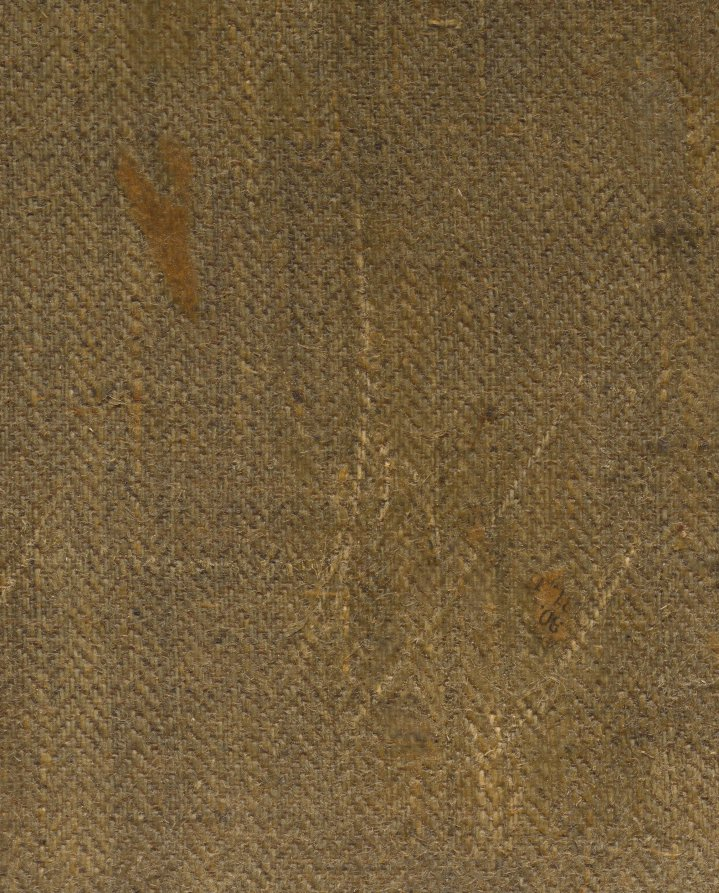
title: Silver Wine Jug, Ham, and Fruit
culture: Netherlands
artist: Abraham van Beyeren (Dutch, 1620/21–1690)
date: c. 1660–66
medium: oil on canvas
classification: Painting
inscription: Signed lower left: "AVB g. [monogram]"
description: With their typically large scale, and loose and energetic brushwork, Abraham van Beyeren’s opulent still life paintings were designed to be seen from a slight distance—perhaps installed over a mantelpiece. Here, for example, the silver wine jug is painted with rough strokes that seem almost abstract when viewed up close, but from a distance it becomes a fully realized object shimmering with complex reflections—including a ghostly self-portrait of the artist at his easel.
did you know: Look closely: the shimmering surface of the silver wine jug reflects a portrait of the artist at his easel.